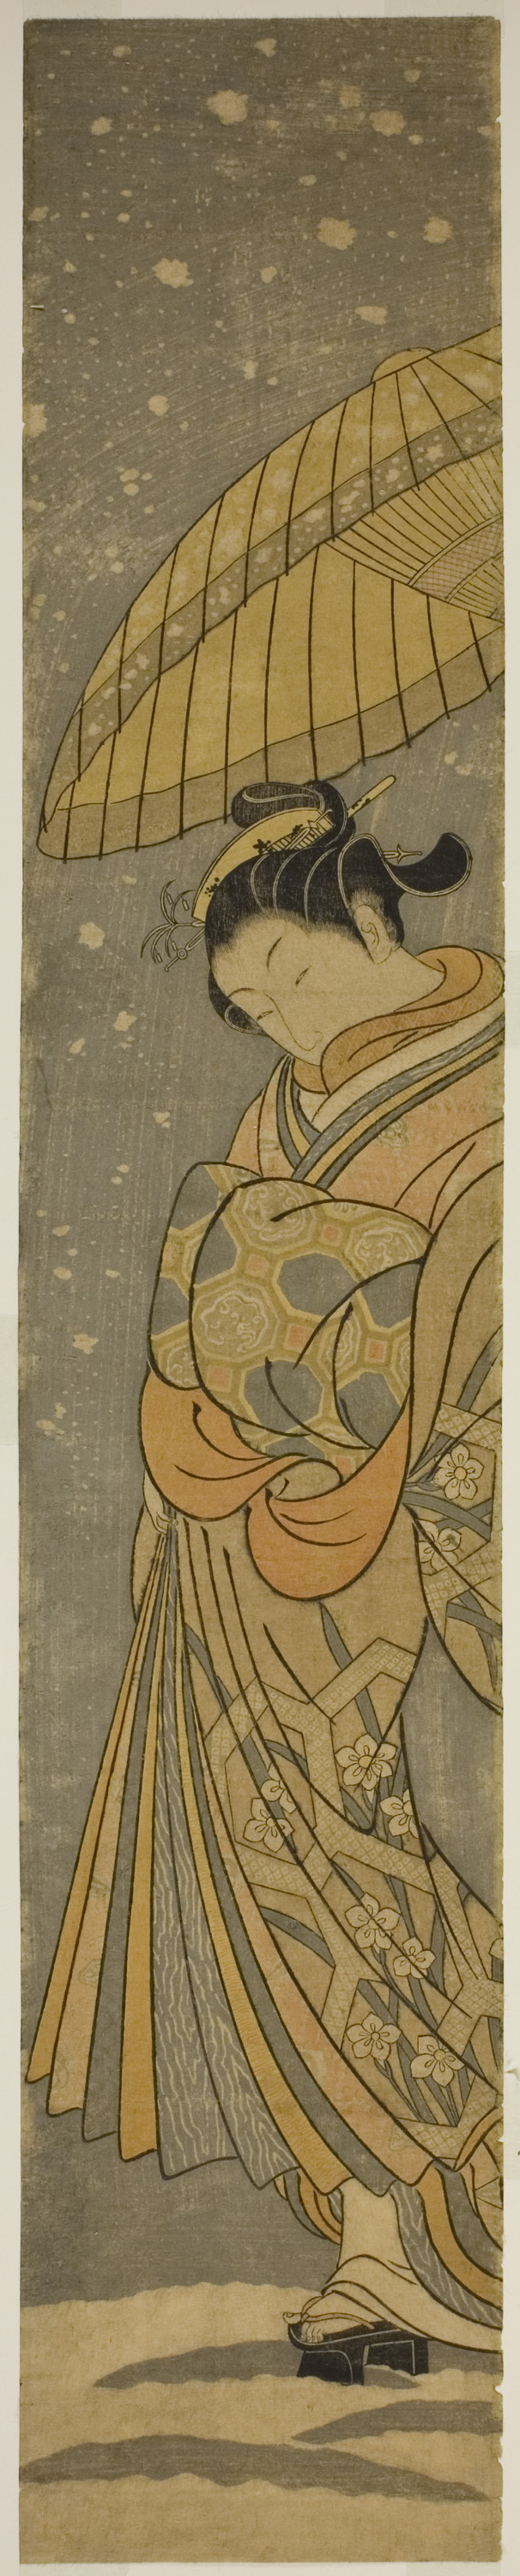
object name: Print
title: Courtesan on Parade in Falling Snow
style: Japanese (culture or style)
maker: Suzuki Harunobu 鈴木 春信; Japanese, 1725 (?)-1770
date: c. 1765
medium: Color woodblock print; hashira-e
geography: Japan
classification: woodblock print; print; asian art